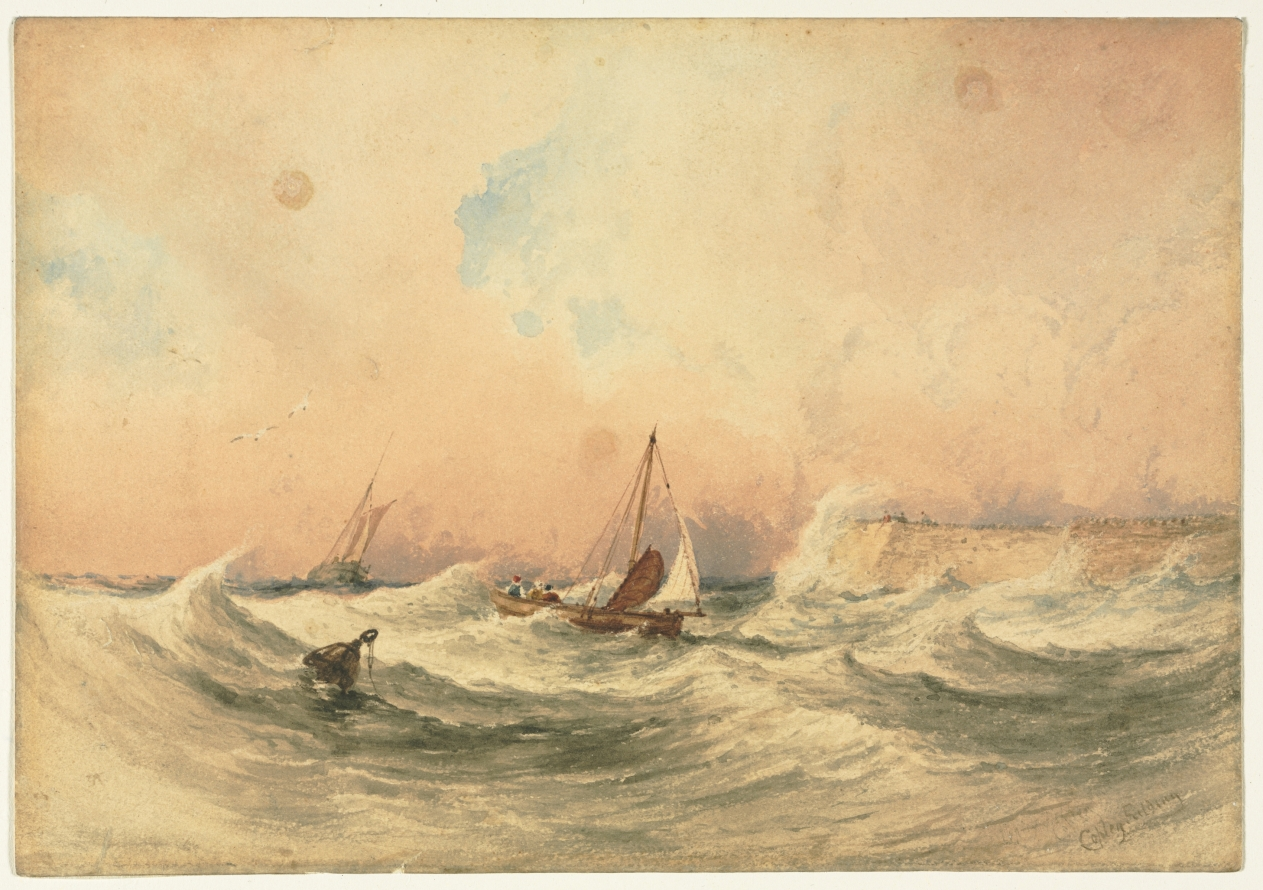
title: Marine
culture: England, 19th century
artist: Anthony Vandyke Copley Fielding (British, 1787–1855)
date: c. 1807–55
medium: watercolor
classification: Drawing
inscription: Signed twice, "Copley Fielding," lower right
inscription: Illegible inscription, lower left